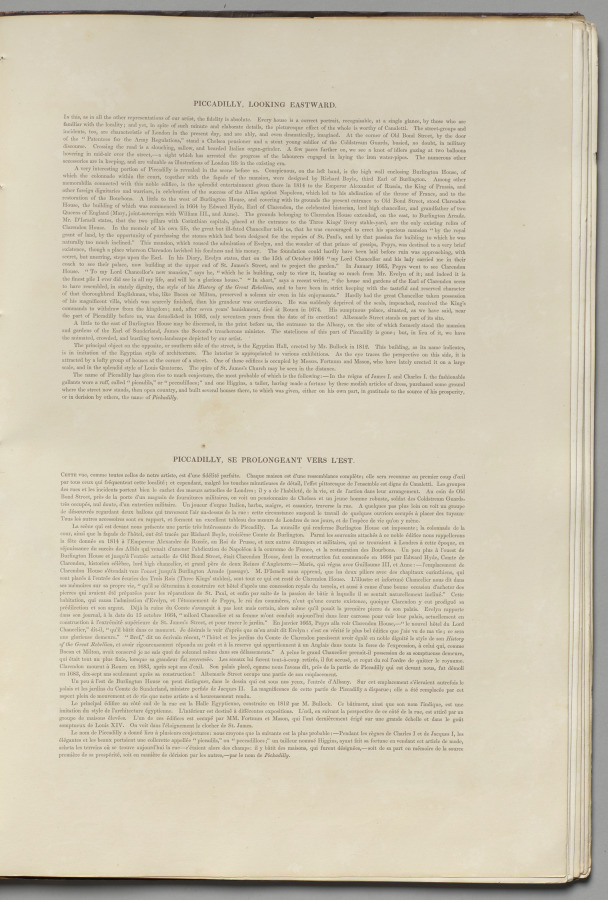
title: London As It Is: Piccadilly, looking Eastward towards the City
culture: England, 19th century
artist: Thomas Shotter Boys (British, 1803–1874)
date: 1842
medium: lithograph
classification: Bound Volume